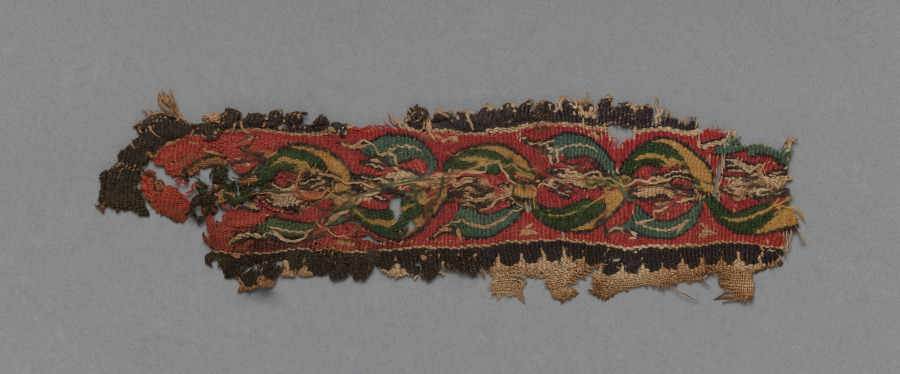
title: Fragment from a Tunic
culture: Egypt, 6th - 16th century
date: 500s - 1500s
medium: tabby weave with inwoven tapestry ornament, linen and wool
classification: Textile